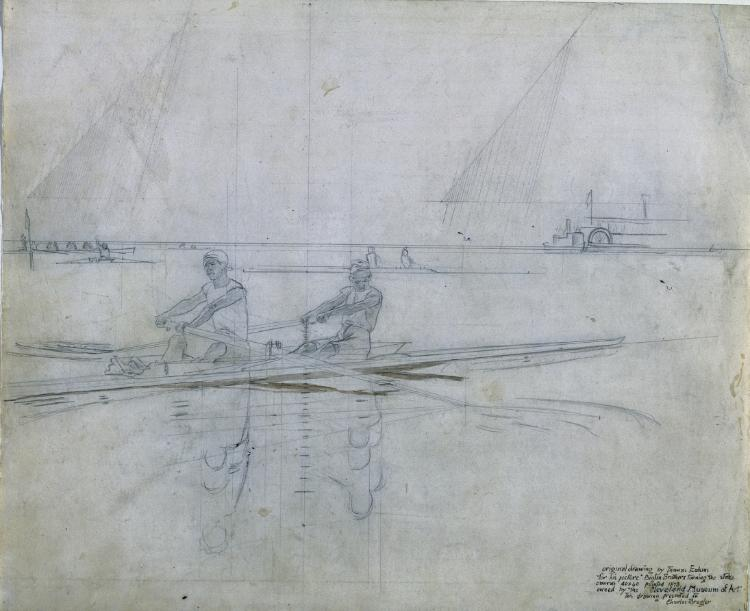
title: The Biglin Brothers Turning the Stake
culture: America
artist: Thomas Eakins (American, 1844–1916)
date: 1873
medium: graphite and brush and brown wash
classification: Drawing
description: Before beginning a large-scale painting such as The Biglin Brothers Turning the Stake, Eakins began a series of specialized studies. He outlined the space of the composition with perspective drawings, such as this sketch in graphite. Eakins also used figure studies when rendering a work, as well as landscape and architectural drawings and his own photographs (examples of which are elsewhere in the exhibition). The practice of using perspective drawings to work out the space of a painting dates back to the Renaissance, revealing Eakins’s academic training.